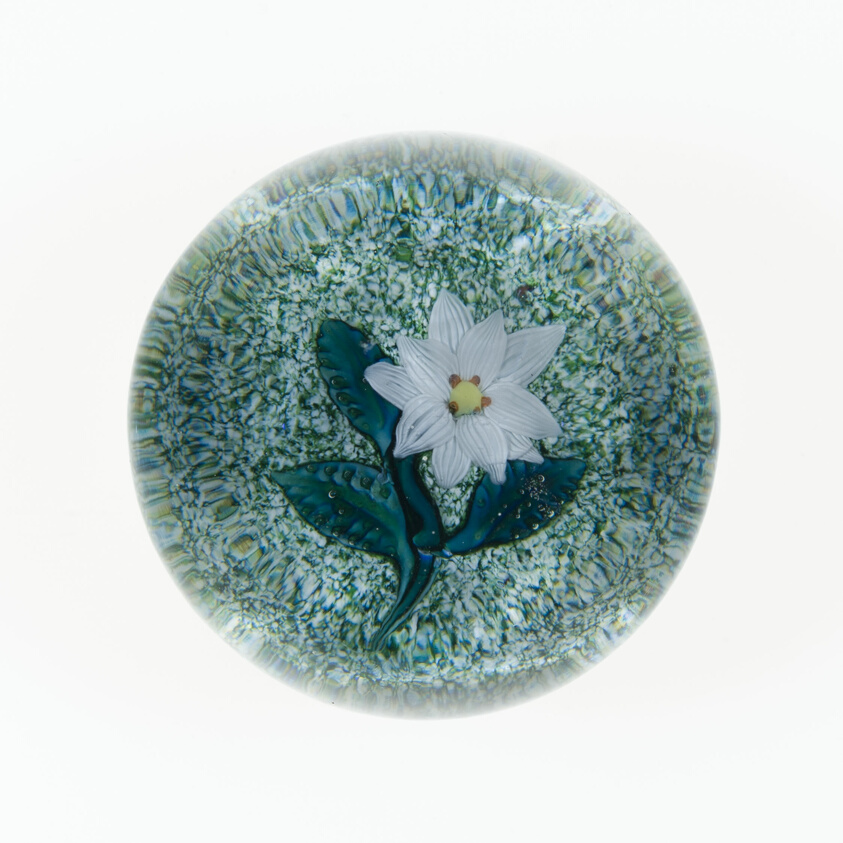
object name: Glass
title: Paperweight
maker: Saint-Louis Glassworks (Cristalleries de Saint-Louis); Lorraine, France, founded 1586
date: c. 1848–55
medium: Glass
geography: Saint-Louis-lès-Bitche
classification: paperweight; lampwork; european decorative arts; glass